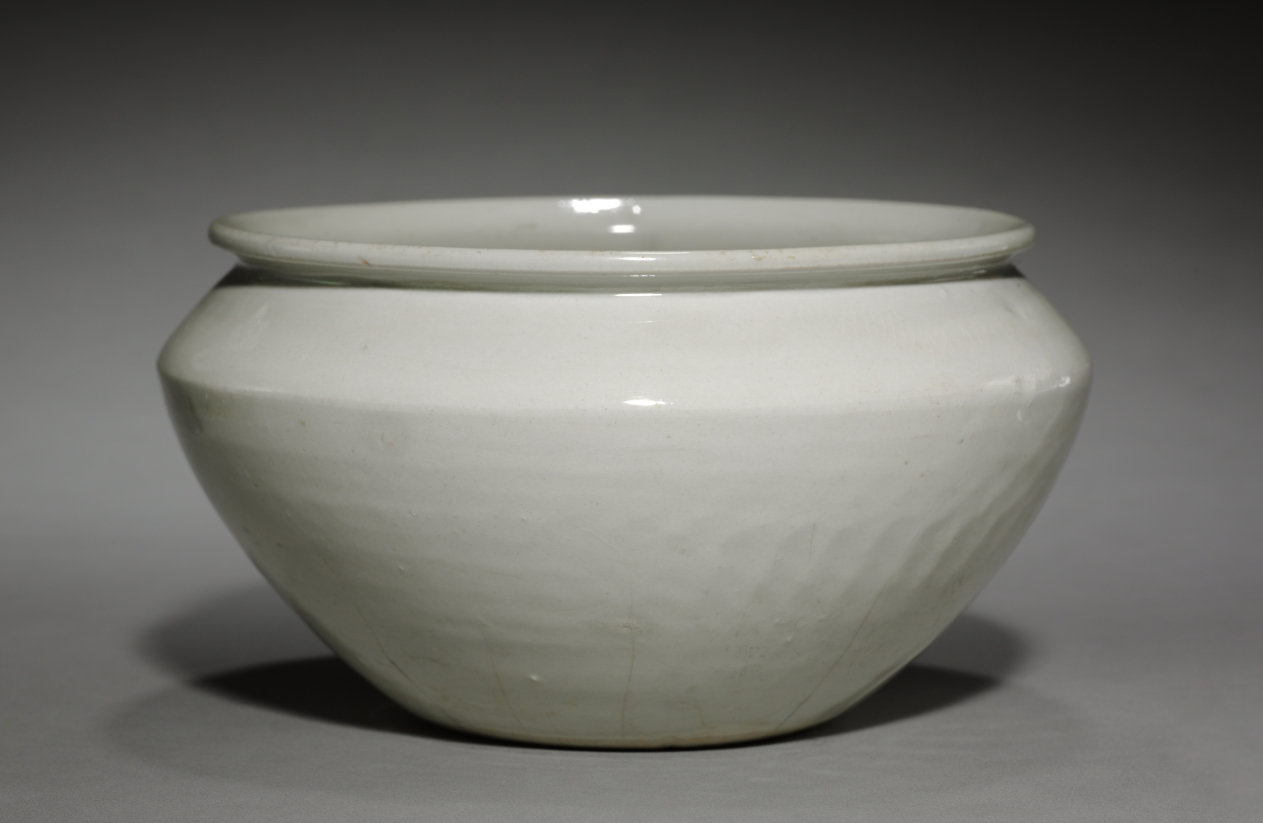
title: Bowl: Southern White Ware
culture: China, Tang dynasty (618-907) - Five dynasties (907-960)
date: late 800s-early 900s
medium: Glazed porcelain, Southern white ware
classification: Ceramic